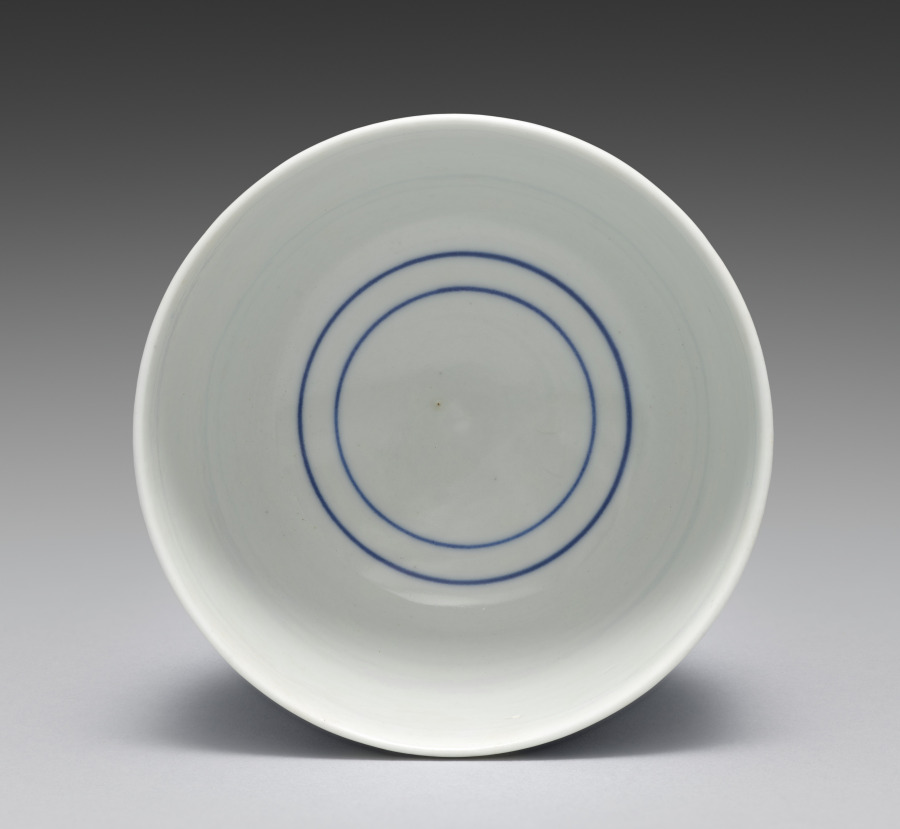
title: Teacup from Teacups with a Hundred Sages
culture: Japan, Meiji period (1868–1912)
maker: Seifū Yohei III (Japanese, 1851–1914)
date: 1893–1914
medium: One from a set of five teacups; porcelain with underglaze blue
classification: Ceramic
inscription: 清風造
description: Each of these five teacups has a painting of identical design in underglaze blue, but as the tiny figures are drawn entirely by hand, each cup has its own personality. The theme of the sencha cups is an assembly of sages or immortals, literally “a hundred venerable [people]” (hyakurō). The myriad figures crowd the scene in groups. The god of longevity, with his tall forehead, sits with his cranes, having flown in from Mt. Penglai on the Isle of the Immortals. Seven long-bearded sages sit around a stone table, chatting and drinking; one is seated on an enormous gourd. Of course, there is a stack of books on the table, and elsewhere, scrolls are being written upon or read—in one case held very close by a sage who is wearing glasses. The design was enormously popular in ceramics made for those engaged in literati culture.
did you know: Seifū Yohei III (1851–1914) produced many works for tea gatherings where people drank Chinese-style leaf-tea (sencha).